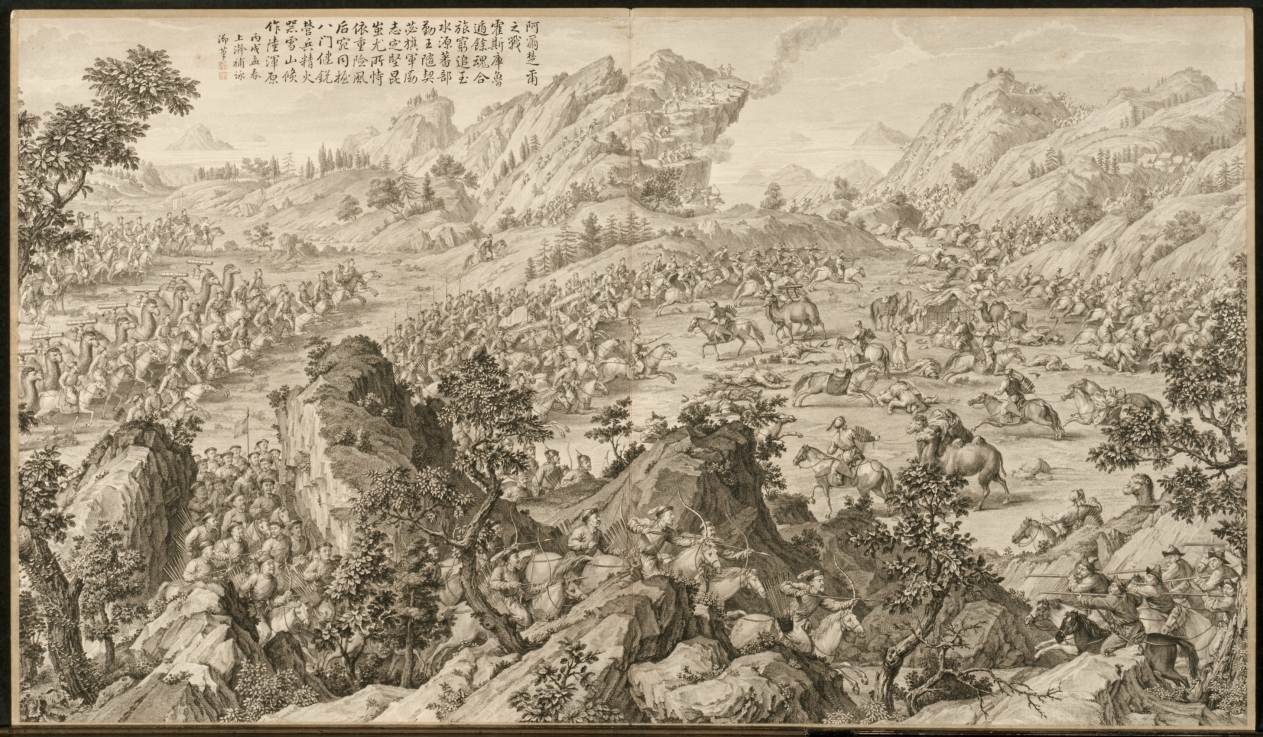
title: Battle at A'erchu'er: from Battle Scenes of the Quelling of Rebellions in the Western Regions, with Imperial Poems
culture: China, Qing dynasty (1644–1911), Qianlong reign (1736–95)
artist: Jean Damascene Sallusti (Italian, d. 1781)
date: c. 1765–74; poem dated 1766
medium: etching, mounted in album form, 16 leaves plus two additional leaves of inscriptions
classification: Print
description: This set of etchings was commissioned by Emperor Qianlong to record in pictorial terms the courage of his generals and soldiers in quelling the rebellions in the Western Regions. Qianlong added his own poem to each of the etchings, indicating his appreciation and pride in this demonstration of military might. "Western Regions" refers to the present-day Xingjiang province, often described in Western writing as "Central Asia."